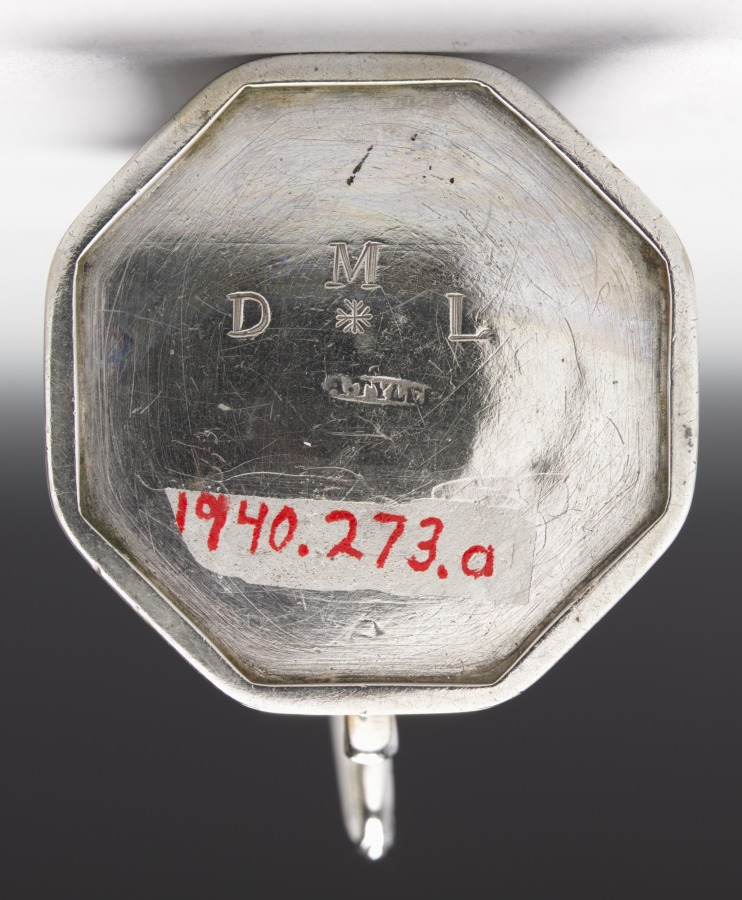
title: Caster with Lid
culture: America, Massachusetts, Boston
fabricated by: Andrew Tyler (American, 1692–1741)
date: c. 1720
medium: silver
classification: Silver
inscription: engraved: "M" over "D * L" in shaded block letters on bottom, and "AM" in block letters on front, opposite handle.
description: A caster was used to spread a finely ground substance, probably pepper.